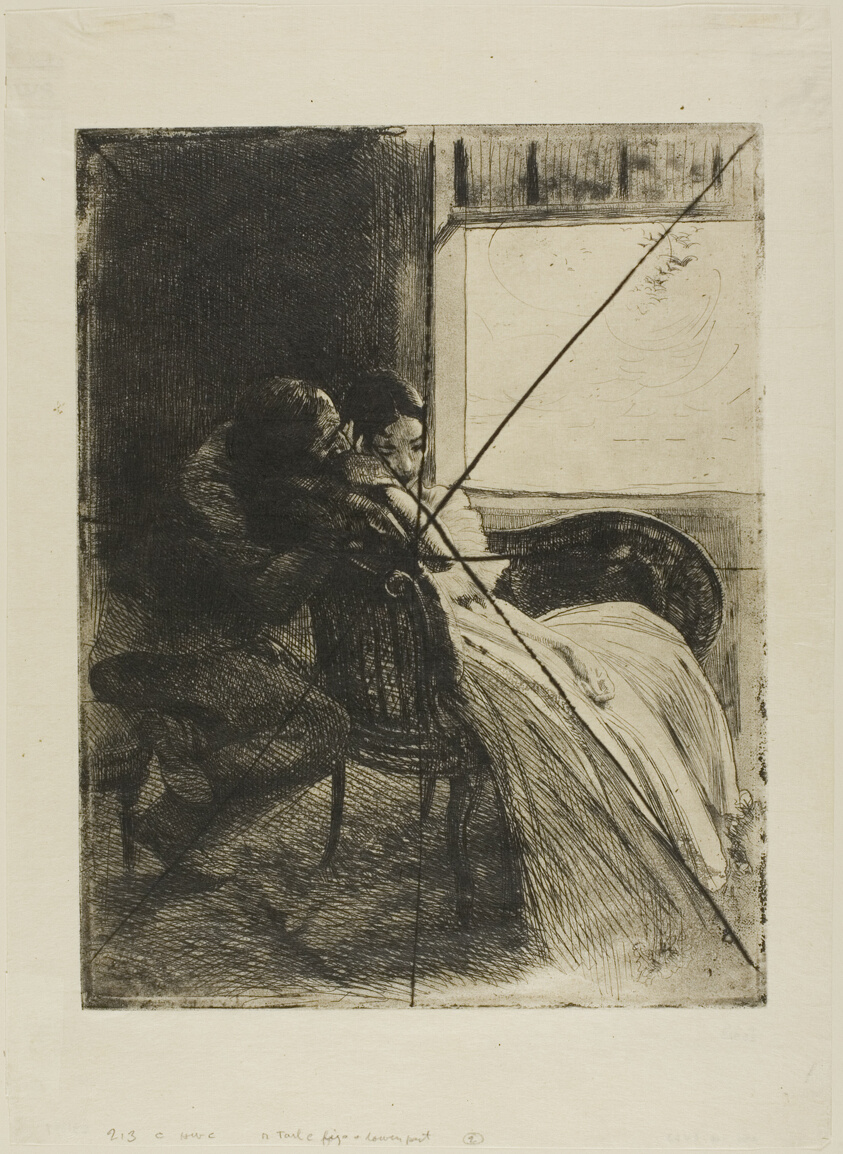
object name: Print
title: Flirtation, plate six from Woman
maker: Albert Besnard (French, 1849-1934)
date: c. 1886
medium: Etching, aquatint and drypoint on cream Japanese paper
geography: France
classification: etching; print; prints and drawing